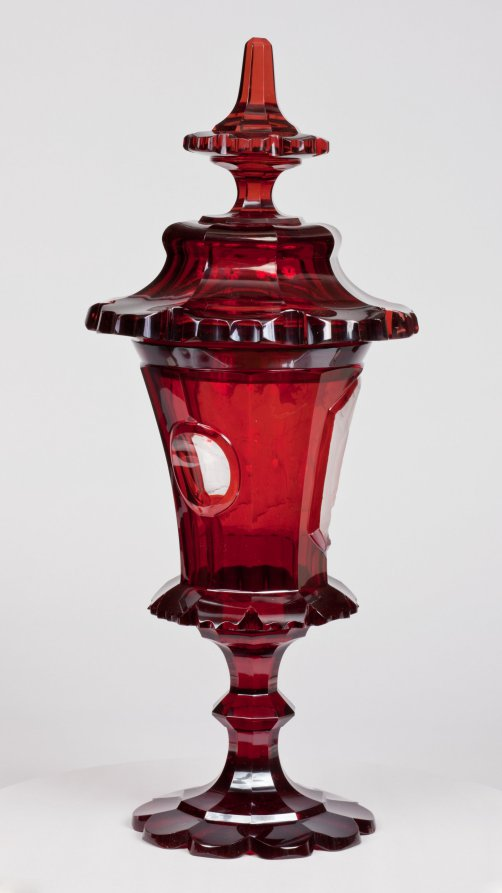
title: Covered Cup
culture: Bohemia, 19th century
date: mid-1800s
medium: ruby glass with engraved decoration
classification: Glass